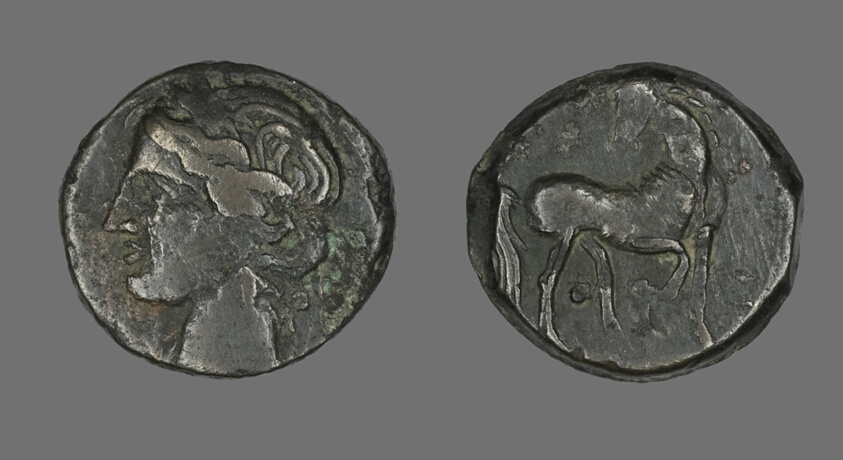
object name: Coin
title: Coin Depicting the Goddess Persephone (?)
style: greek, ancient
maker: Greek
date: about 241-146 BCE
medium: Bronze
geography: Ancient Greece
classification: coin; ancient art